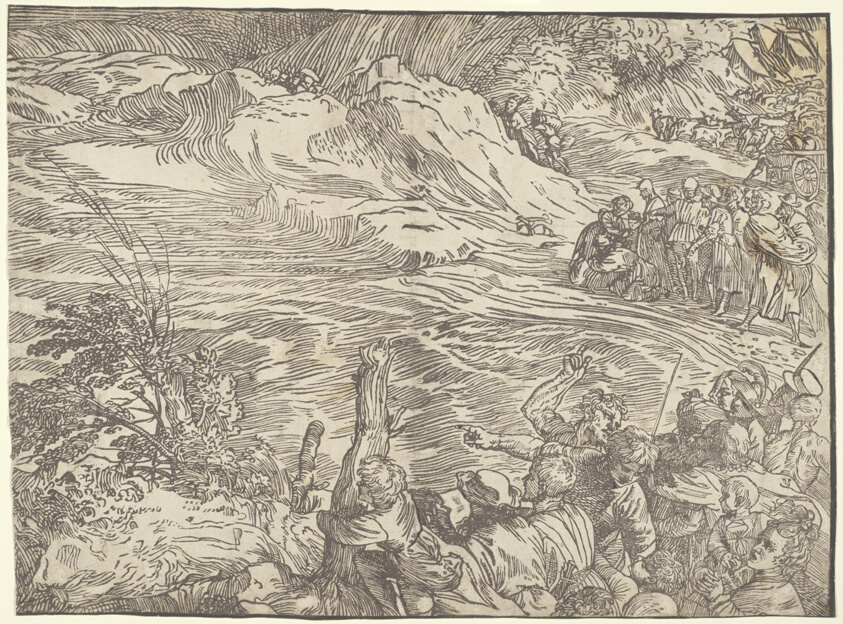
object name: Print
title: The Submersion of Pharaoh's Army in the Red Sea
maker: After Titian (Italian, c. 1488-1576); published by Domenico dalle Greche (Italian, active 1543-1558)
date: c. 1515, printed 1549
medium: Woodcut in black on ivory laid paper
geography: Italy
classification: woodcut; prints and drawing; print